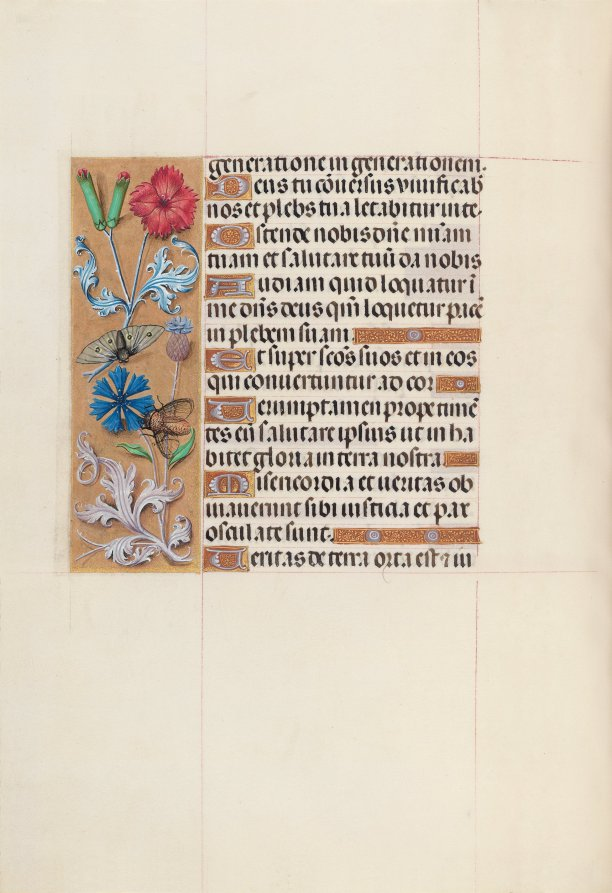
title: Hours of Queen Isabella the Catholic, Queen of Spain: Fol. 128v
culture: Flanders, Ghent and Bruges, late 15th century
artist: Master of the First Prayerbook of Maximillian (Flemish, c. 1444–1519)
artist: and Associates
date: c. 1500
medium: ink, tempera, and gold on vellum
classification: Bound Volume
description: This manuscript was illuminated by a circle of at least five highly organized manuscript painters active in the Flemish cities of Ghent and Bruges. The principal illuminator was Alexander Bening, who painted the majority of the book's miniatures. Manuscripts produced by this circle of artists are renowned for the decoration of their borders, which typically feature a rich variety of realistically-painted flowers, birds, and butterflies. This prayer book, called a book of hours, was intended not for a cleric, but for the private devotions of a lay person-in this case, Isabella the Catholic, Queen of Spain (1451-1504). Isabella's coat of arms embellishes the book's frontispiece. It is unlikely that the book was commissioned by the Queen herself; rather, she probably received it as a diplomatic gift from someone courting her patronage, perhaps Cardinal Francisco Jimenez de Cisneros. A Franciscan friar, Jimenez was dependent upon Isabella for his advancement, first to the post of Queen's confessor in 1492, and then to Archbishop of Toledo in 1495.